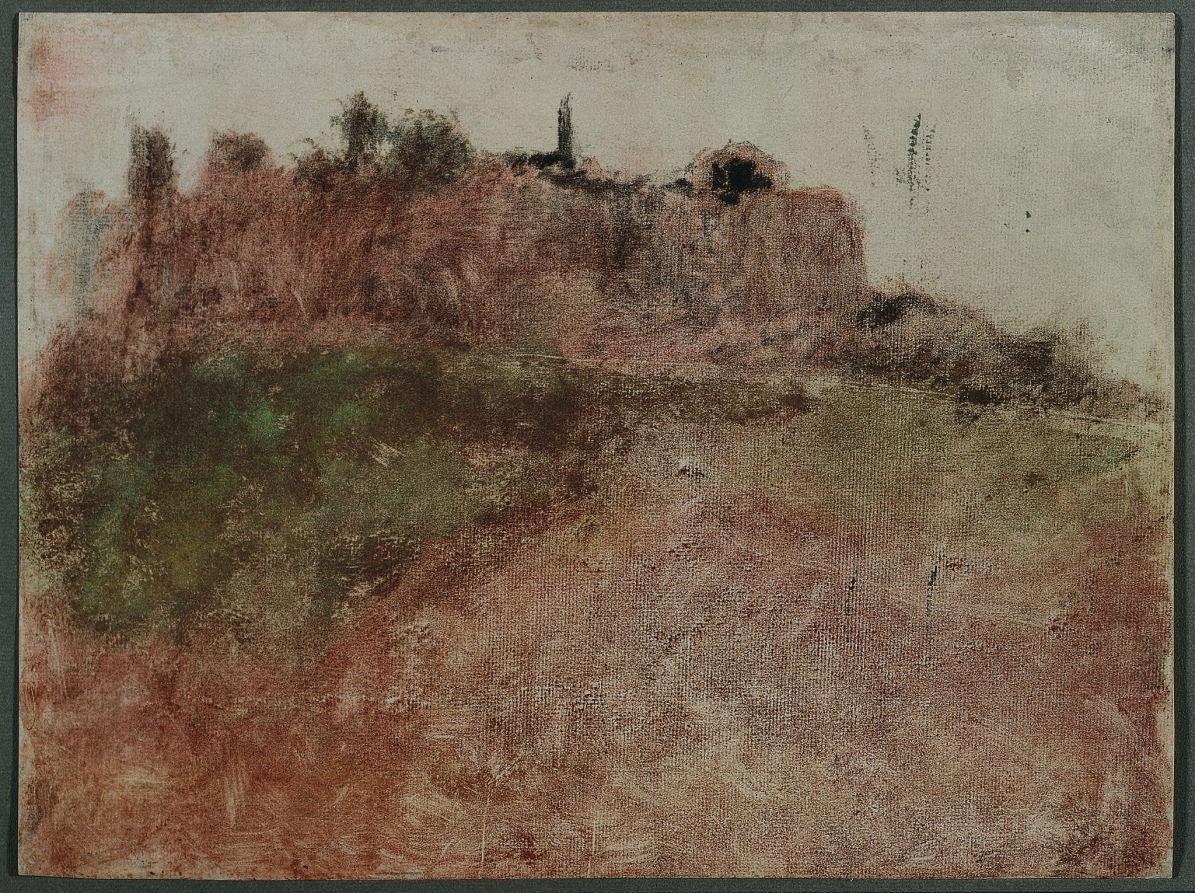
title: Estérel Village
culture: France, 19th century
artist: Edgar Degas (French, 1834–1917)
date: c. 1890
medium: color monotype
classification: Print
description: This landscape is one of many monotypes that Edgar Degas produced throughout his career. The work belongs to a series Degas made while visiting a friend in the French countryside. Its blurriness resembles the view he saw out the window of trains and carriages during his travels. To translate the effects of weather and the natural terrain, he created layers of color and texture that border on abstraction in the final composition.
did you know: Edgar Degas made a total of about 60 similarly abstract landscapes using monotype around the time he made this print.